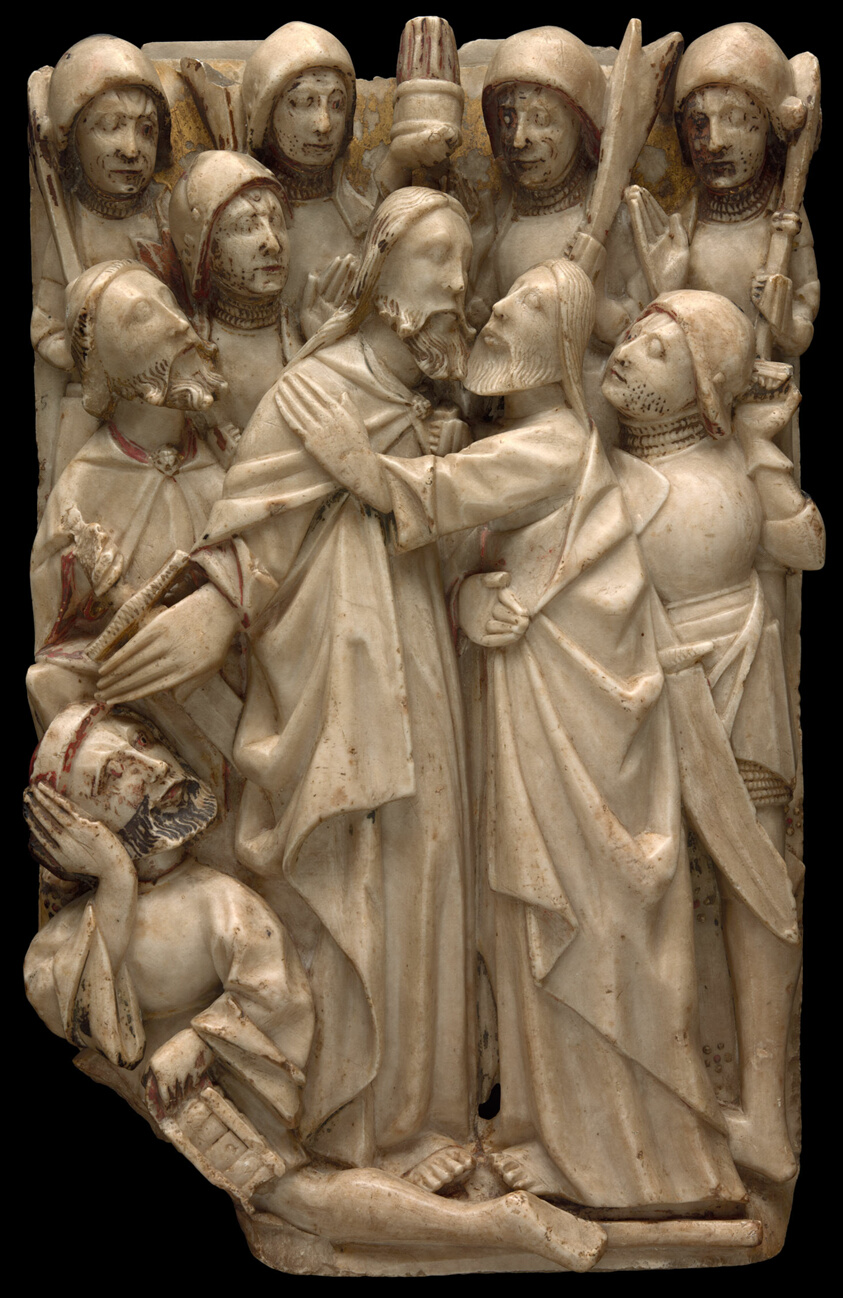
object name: Sculpture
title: The Betrayal of Christ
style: sixteenth century, 16th Century, Renaissance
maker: English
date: 1500/25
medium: Alabaster, traces of polychromy and gilding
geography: Nottingham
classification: relief; sculpture; alabastron; british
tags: Christian subjects, swords, weapons, soldiers, Jesus, men, religious scenes, religious figures, religious, religion, Christianity